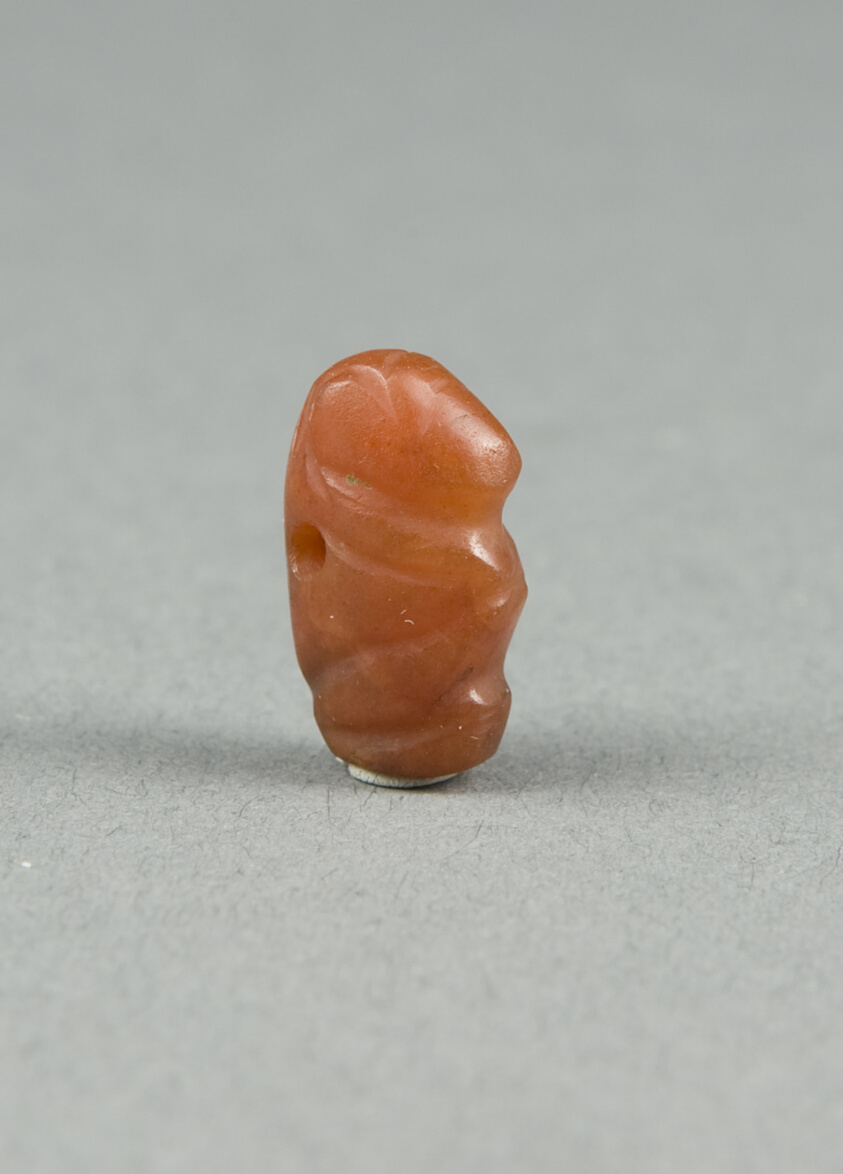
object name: Costume and Accessories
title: Amulet of a Squatting Ape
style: middle kingdom, egyptian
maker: Egyptian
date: First Intermediate Period–Middle Kingdom (about 2160–1784 BCE)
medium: Carnelian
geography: Egypt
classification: amulet; jewelry; stone; ancient art; costume